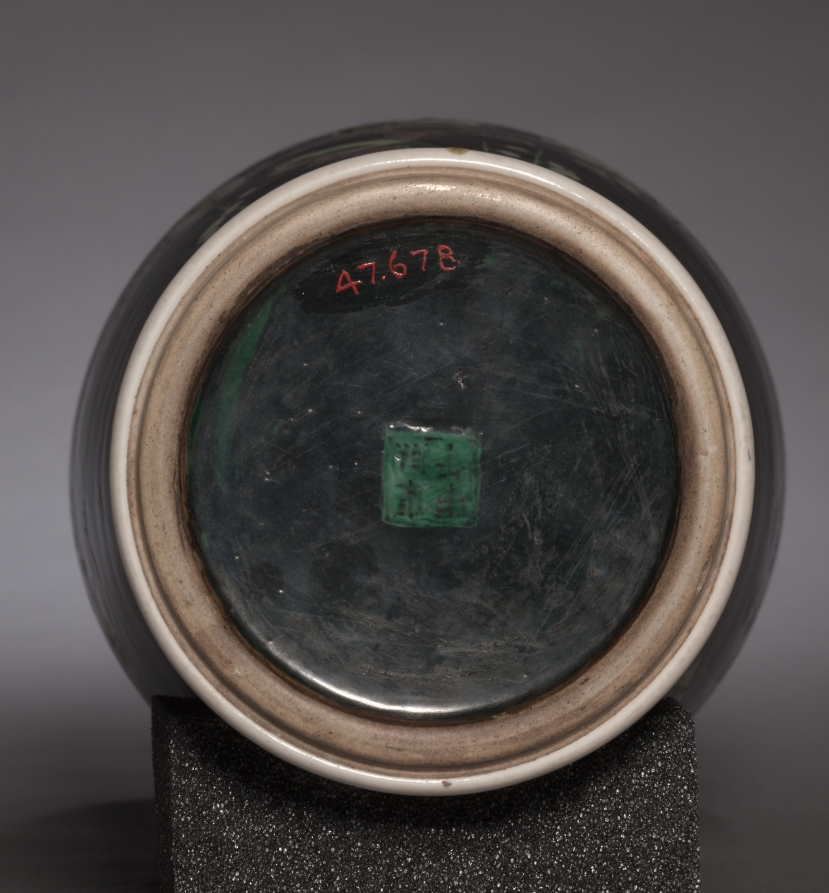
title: Baluster Vase with Blossoming Cherry Tree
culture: China, Qing dynasty (1644-1911), Kangxi reign (1662-1722)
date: 1714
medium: porcelain with polychrome enamel decoration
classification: Ceramic